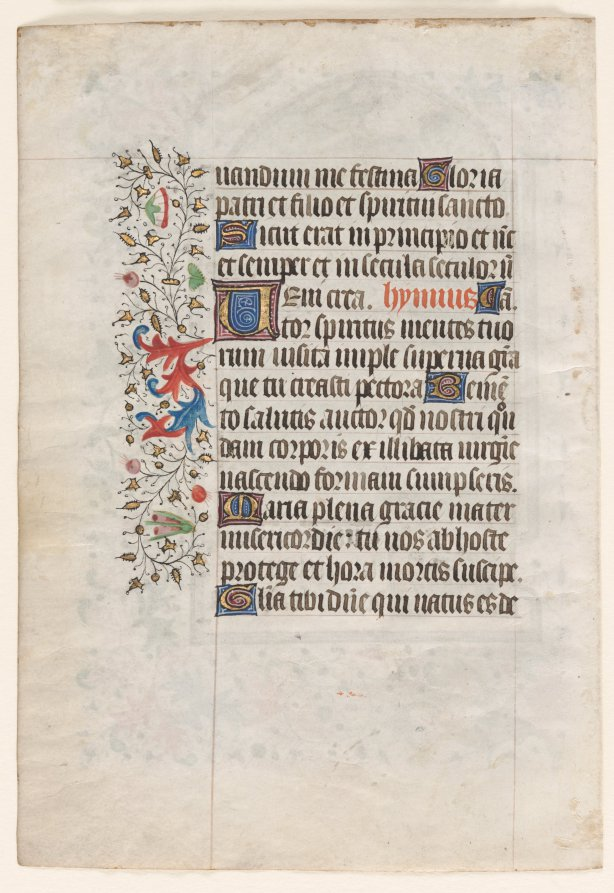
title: Leaf from a Book of Hours: Annunciation to the Shepherds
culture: France, Troyes?, 15th century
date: c. 1460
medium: ink, tempera and gold on vellum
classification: Manuscript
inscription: Deus in aduitorium meum intende...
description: The shepherd and shepherdess gaze up toward a pair of angels who are announcing that Christ has been born. A dog is curled at their feet while sheep graze around them. This anonymous painter had a highly personal style recognized by its facial types, architectural forms, and a love of sumptuous textile patterns. He has been associated with other books of hours that were produced in and for the city of Troyes in France.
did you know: Although we don't know the name of the artist, other leaves by the same individual have been identified in other collections.